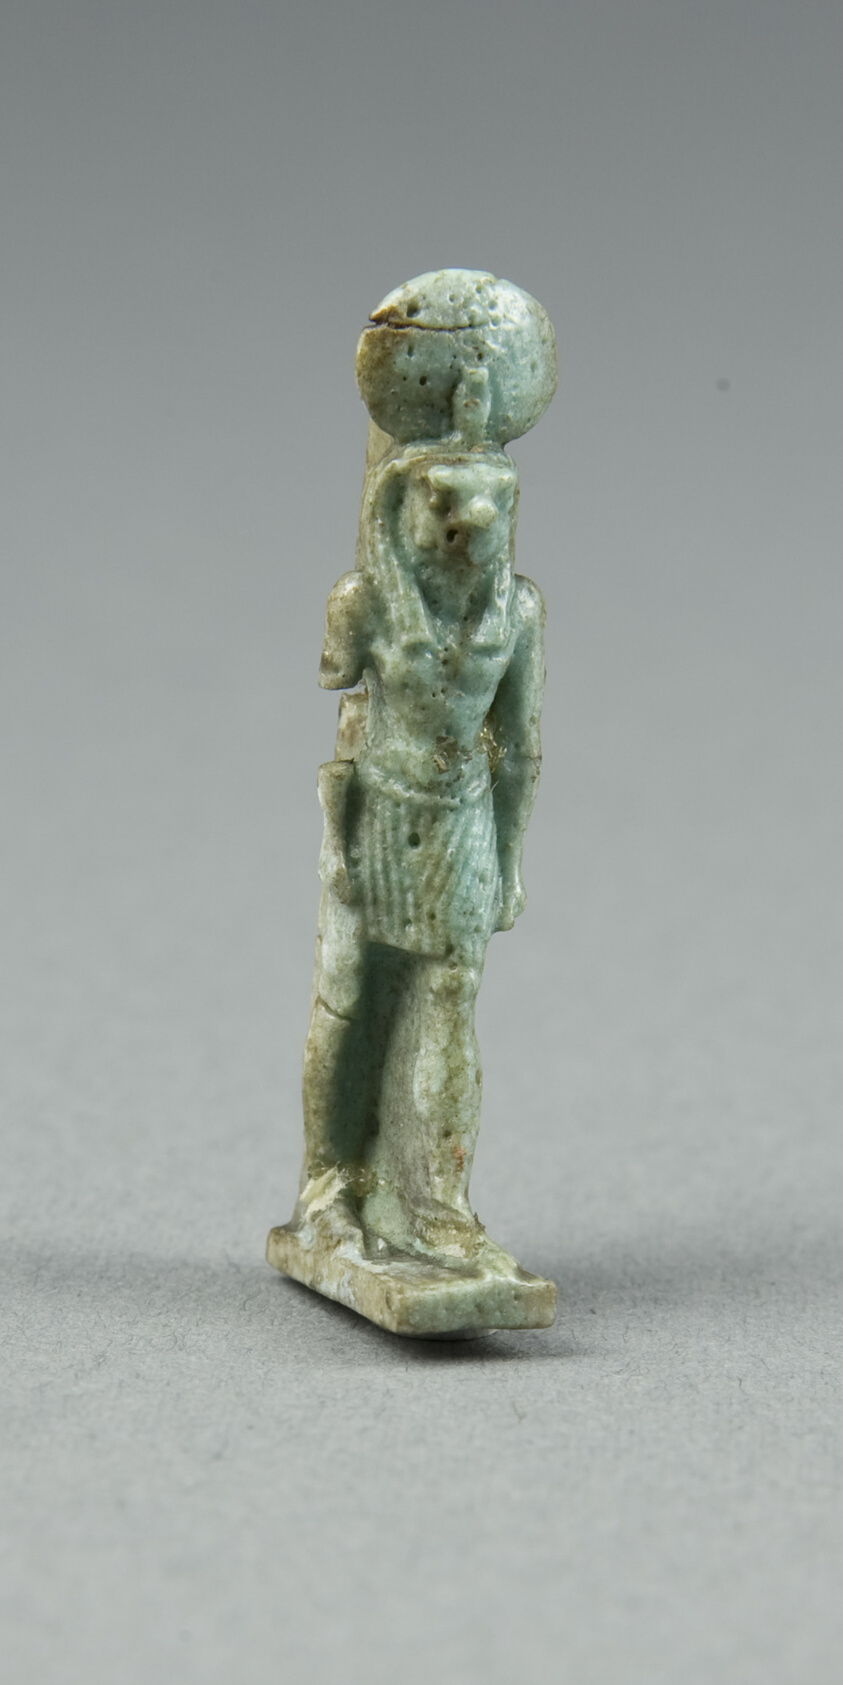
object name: Costume and Accessories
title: Amulet of the God Re-Horakhty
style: egyptian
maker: Egyptian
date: Third Intermediate Period, Dynasties 21–25 (about 1069–664 BCE)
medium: Faience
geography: Egypt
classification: amulet; jewelry; ceramics; ancient art; costume; faïence (composite material)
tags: gods (deities)